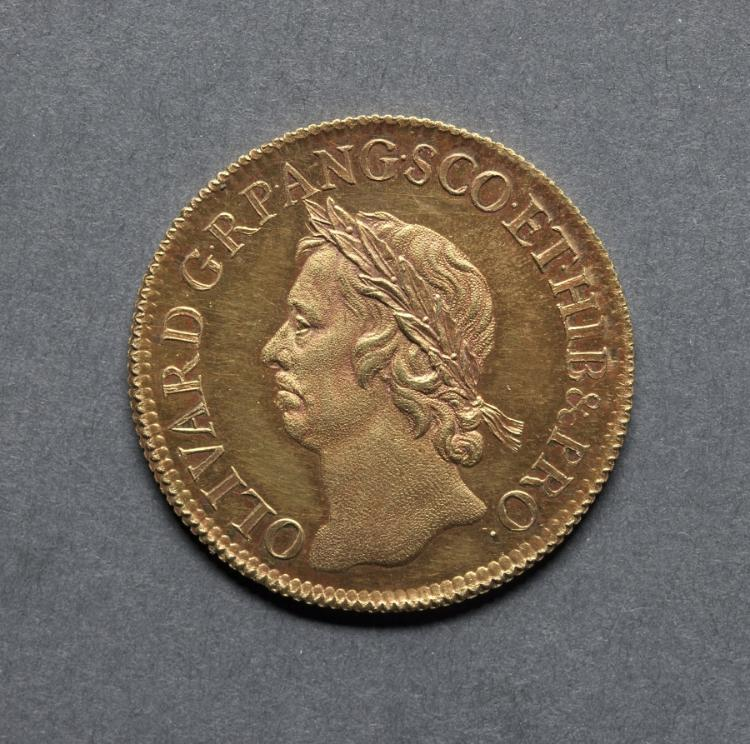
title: Broad: Oliver Cromwell Lord Protector (obverse)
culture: England, Oliver Cromwell, Lord Protector, 1653-1658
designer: Thomas Simon (British)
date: 1656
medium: gold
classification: Coins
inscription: OLIVAR · D · G · RP · ANG · SCO · ET · HIB & PRO